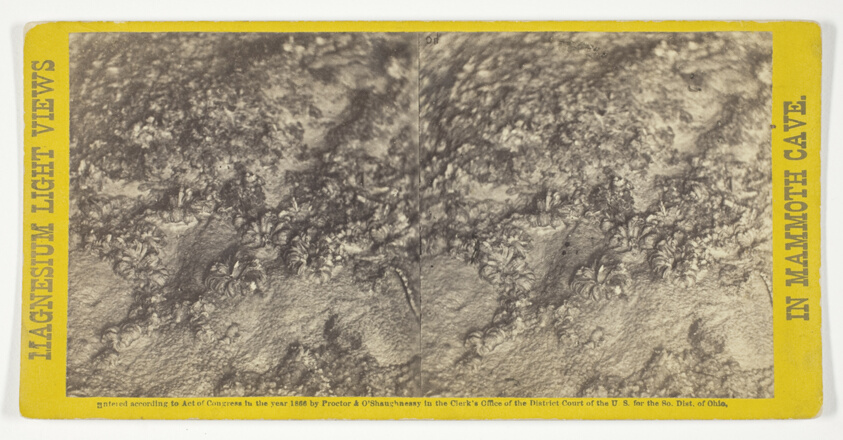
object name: Photograph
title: "Rosa's Bower", No. 40 from the series "Mammoth Cave Views"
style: 19th century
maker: Chas. Waldack (American, active 1860s)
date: 1866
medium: Albumen print, stereo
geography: New York City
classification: photography; photograph